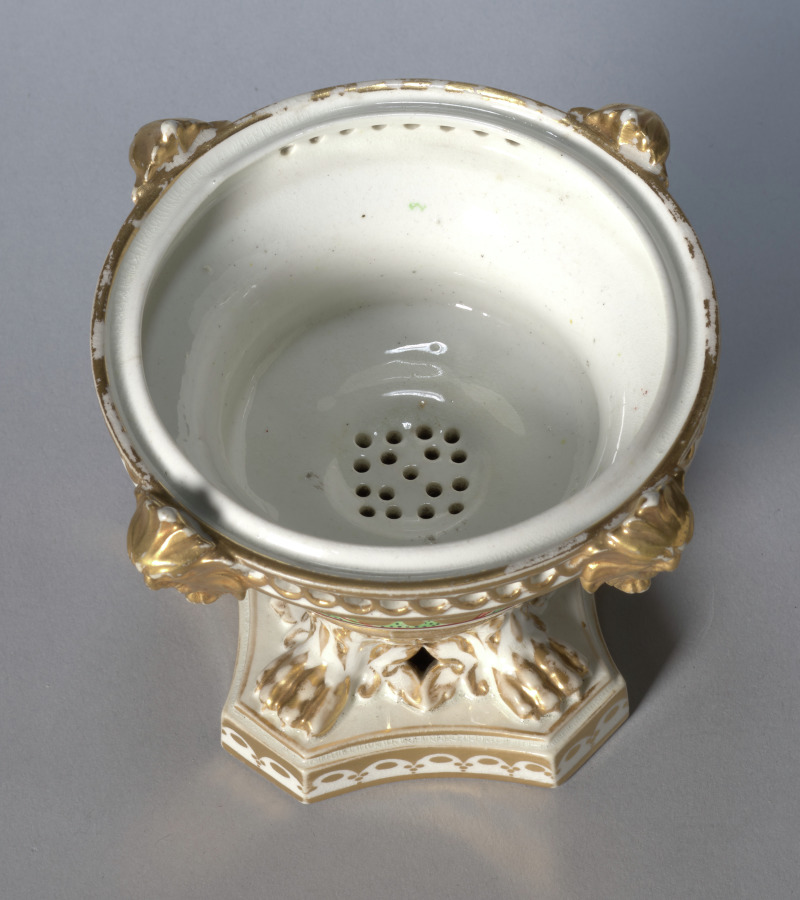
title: Potpourri Vase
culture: England, Derby, 19th century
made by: Derby (Crown Derby Period) (British)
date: c. 1810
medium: porcelain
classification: Ceramic